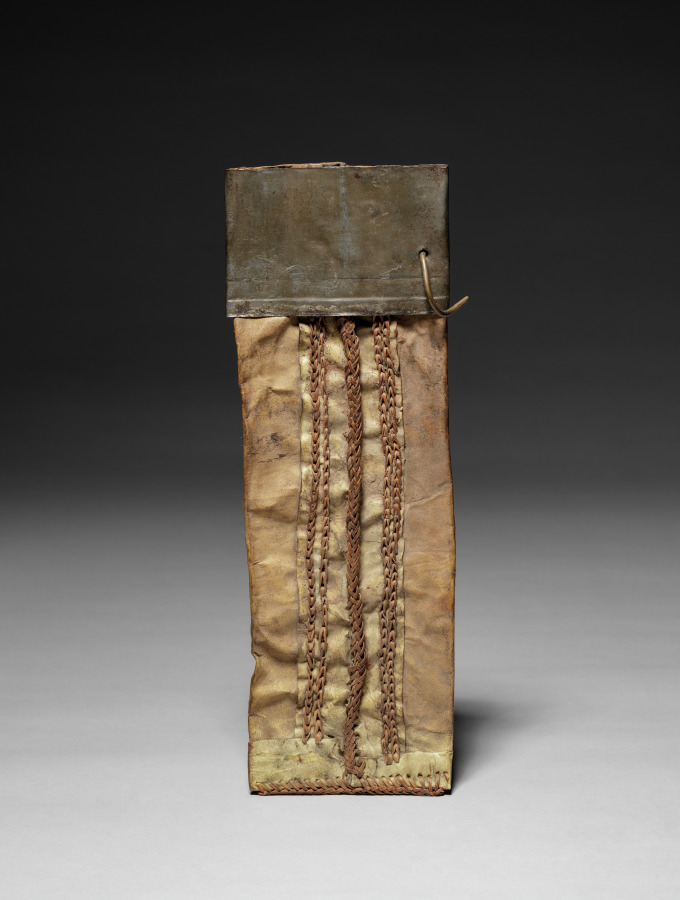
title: Sheath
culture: Africa, Central Africa, Democratic Republic of Congo, unknown maker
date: 1800s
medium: Rawhide, metal, plant fiber, and copper alloy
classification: Arms and Armor